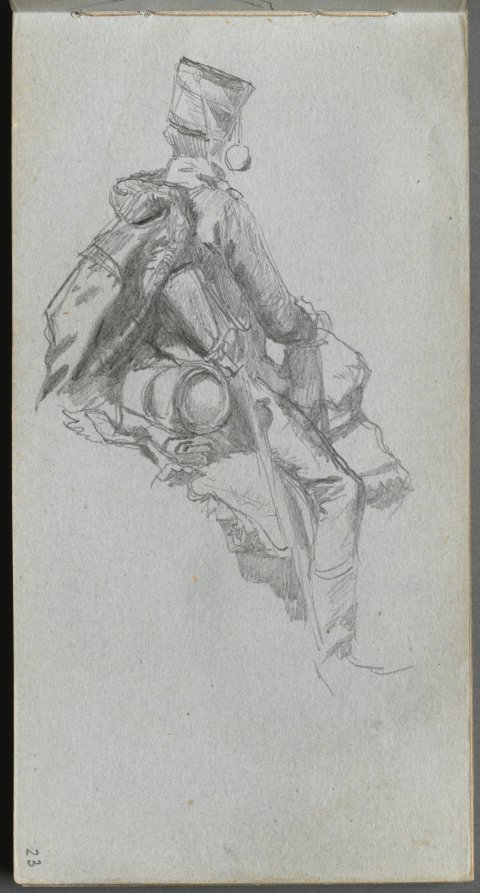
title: Sketchbook, page 23: Seated Soldier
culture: France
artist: Ernest Meissonier (French, 1815–1891)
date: c. 1860s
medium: graphite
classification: Bound Volume